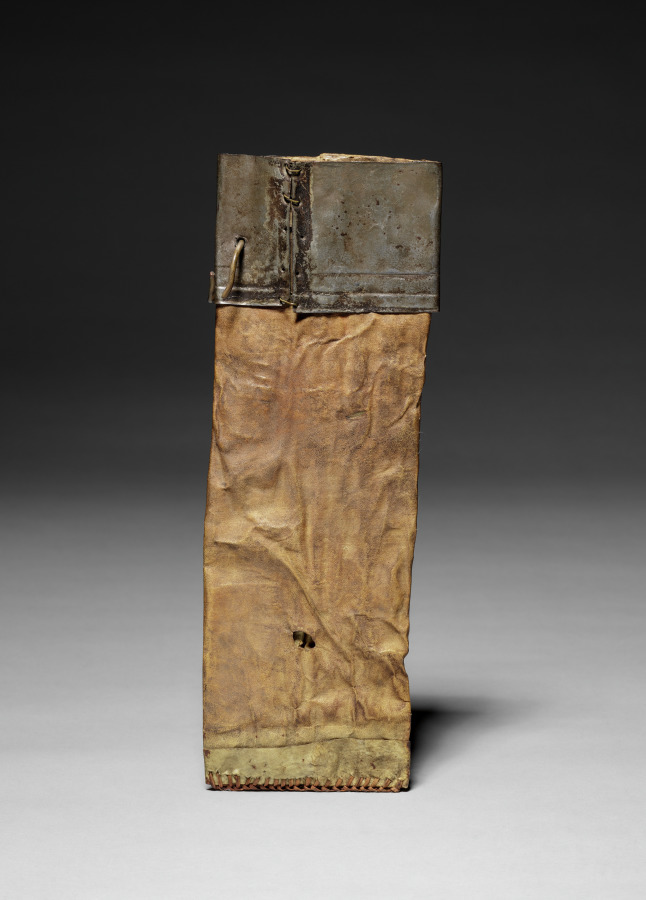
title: Sheath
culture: Africa, Central Africa, Democratic Republic of Congo, unknown maker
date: 1800s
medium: Rawhide, metal, plant fiber, and copper alloy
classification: Arms and Armor